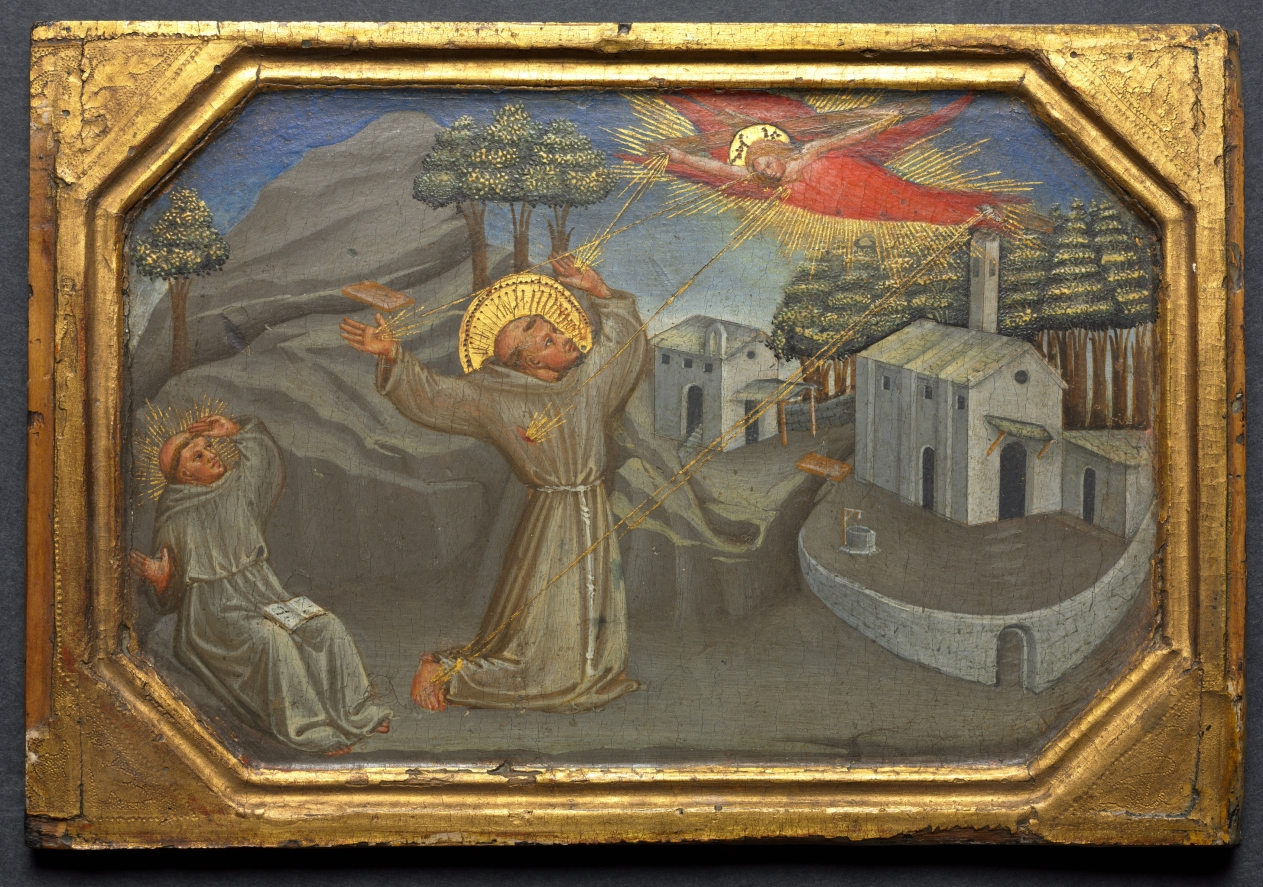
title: St. Francis of Assisi Receiving the Stigmata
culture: Italy, 15th century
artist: Bicci di Lorenzo (Italian, 1373–1452)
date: c. 1430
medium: tempera and gold on wood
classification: Painting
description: Although born into a wealthy merchant family, St. Francis (1181-1226) rejected all wordly goods, dedicating himself to chastity, humility, and selfless acts of kindness. By the time of his death, the order of friars he founded had expanded throughout Europe. In the summer of 1224, Francis visited a mountain retreat at La Verna near Assisi. After weeks of intense prayer, an angel on a cross appeared. The painter shows mystical rays of light emanating from the angel and leaving Francis with stigmata, wounds resembling those Christ suffered at the time of his crucifixion. Behind the saint, a follower throws up his hands in amazement. This predella panel, which was mounted in a row of related scenes below a larger painting, retains its original frame.